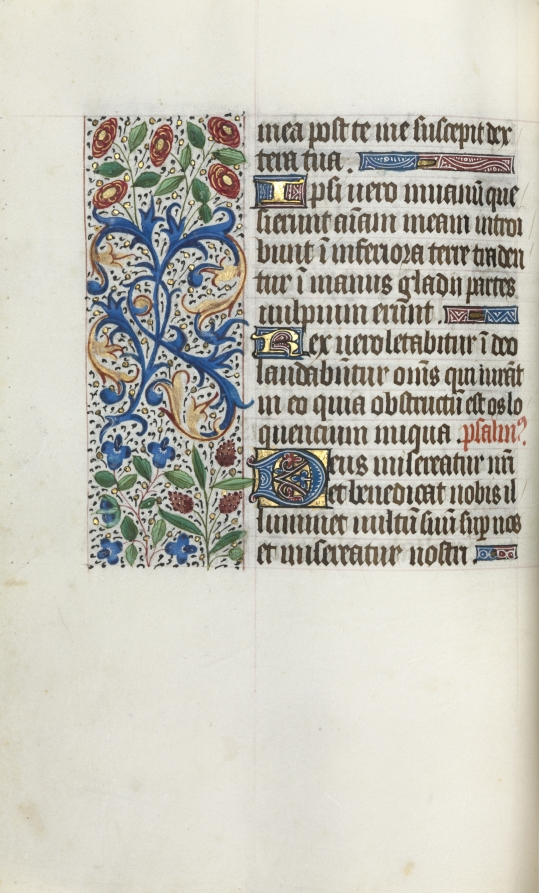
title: Book of Hours (Use of Rouen): fol. 40v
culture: France, Rouen, 15th century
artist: Master of the Geneva Latini (French, active Rouen, 1460–80)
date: c. 1470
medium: ink, tempera, and gold on vellum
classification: Bound Volume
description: In the late 1400s and early 1500s Rouen was an established and important center of book production. The city’s cathedral had a wealthy chapter that spent large sums of money to commission books and to maintain its extensive library. The stationers and booksellers would have likely been concentrated in or near the cathedral precinct. This artist, named after a manuscript now in Geneva, was Rouen’s principal illuminator during the second half of the 1400s.